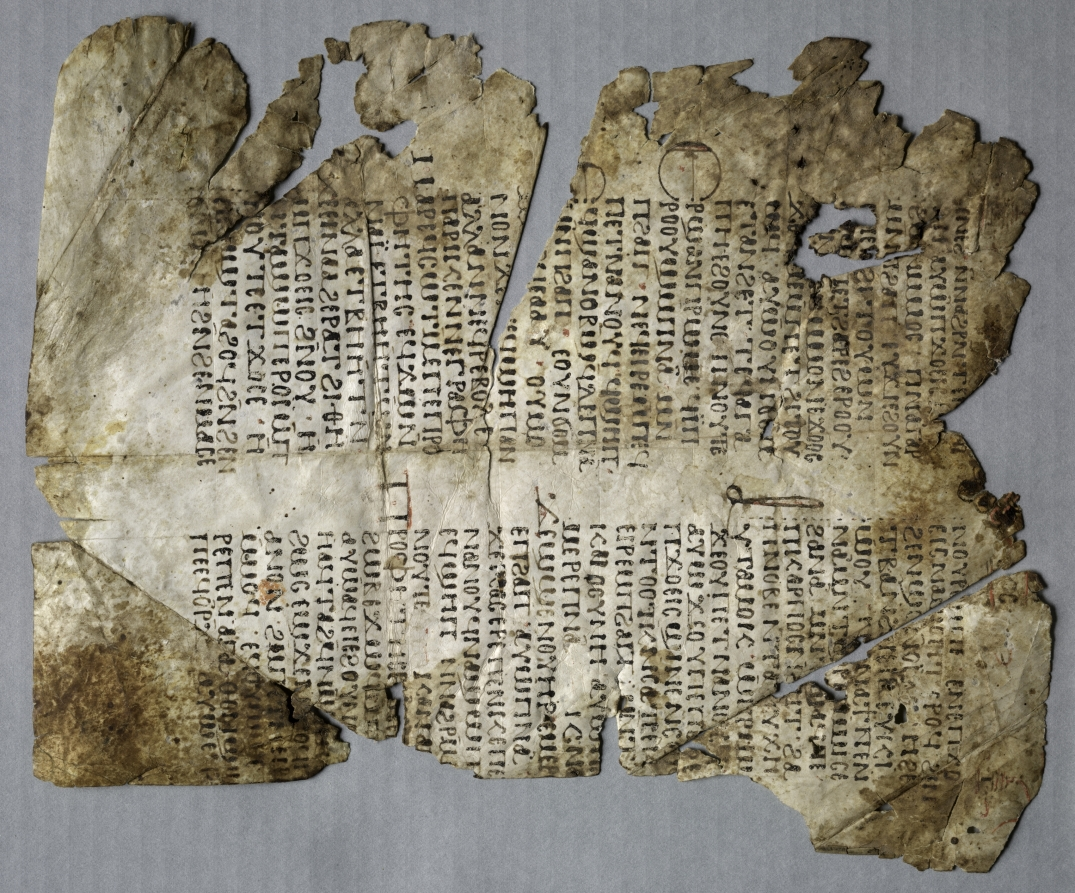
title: Leaves from a Christian Homily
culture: Egypt, Coptic period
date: 500s-600s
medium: ink on vellum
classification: Manuscript